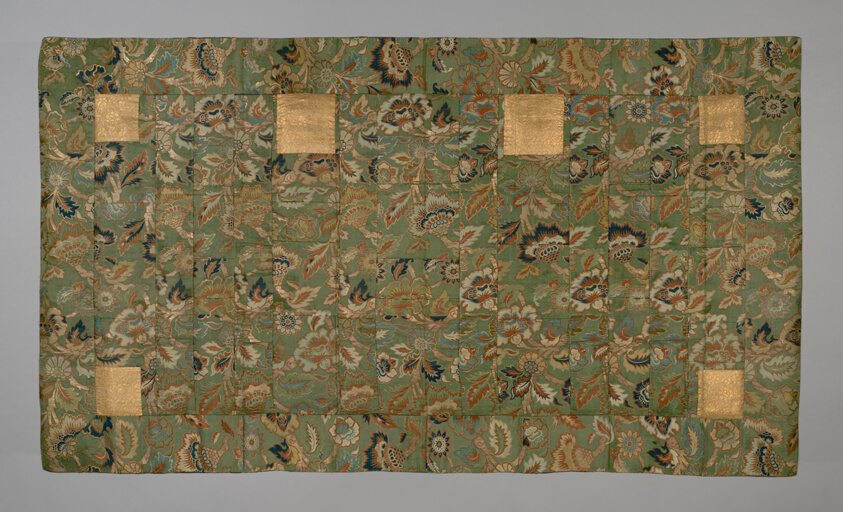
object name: Textile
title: Kesa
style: late edo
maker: Japan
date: late Edo period (1789–1868), 1850/63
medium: Hiri, yô, and jô: silk and gold-leaf-over-lacquered-paper strip, twill weave with interlacings of secondary binding warps and supplementary patterning wefts; shiten and niten: silk and gold-leaf-over-lacquered-paper strip, twill weave with interlacings of secondary binding warps and supplementary patterning wefts; lining: silk, plain weave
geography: Japan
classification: textile; weaving; liturgical - buddhist